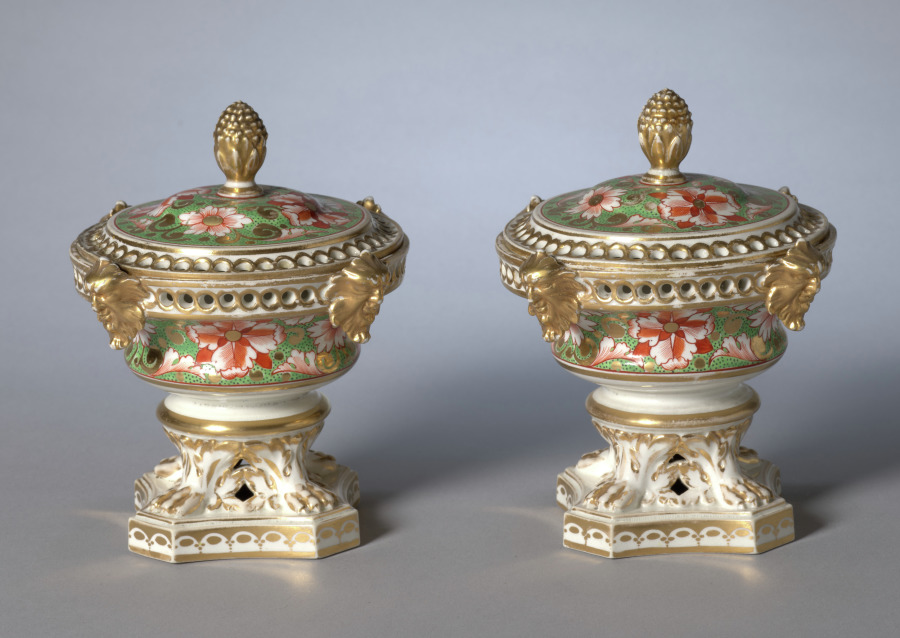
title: Pair of Potpourri Vases with Covers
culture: England, Derby, 19th century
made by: Derby (Crown Derby Period) (British)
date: c. 1810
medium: porcelain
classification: Ceramic